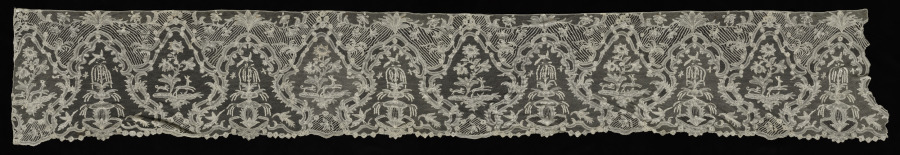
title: Lace Flounce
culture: Belgium, Brabant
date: 1700s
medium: Linen: bobbin lace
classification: Lace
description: This piece of lace depicts fountains alternating with a deer and a dog by a flowering tree.